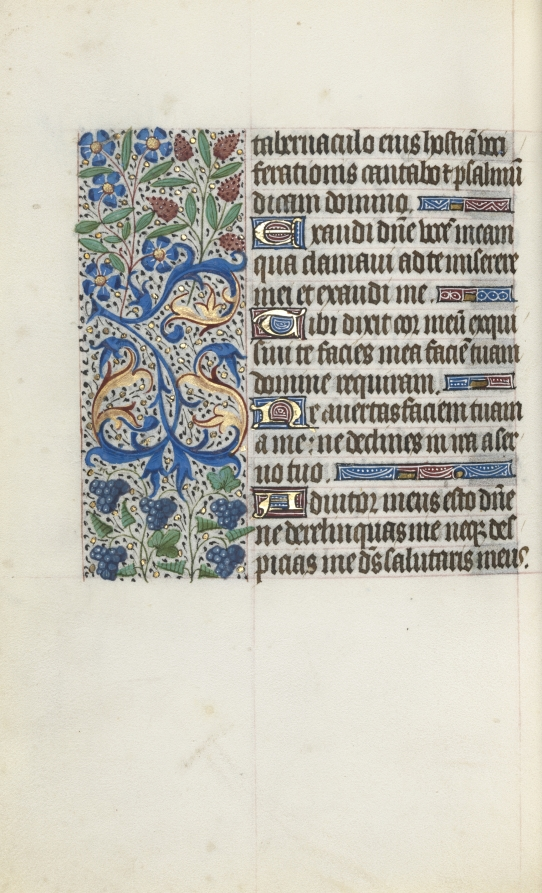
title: Book of Hours (Use of Rouen): fol. 121v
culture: France, Rouen, 15th century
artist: Master of the Geneva Latini (French, active Rouen, 1460–80)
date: c. 1470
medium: ink, tempera, and gold on vellum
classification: Bound Volume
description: In the late 1400s and early 1500s Rouen was an established and important center of book production. The city’s cathedral had a wealthy chapter that spent large sums of money to commission books and to maintain its extensive library. The stationers and booksellers would have likely been concentrated in or near the cathedral precinct. This artist, named after a manuscript now in Geneva, was Rouen’s principal illuminator during the second half of the 1400s.